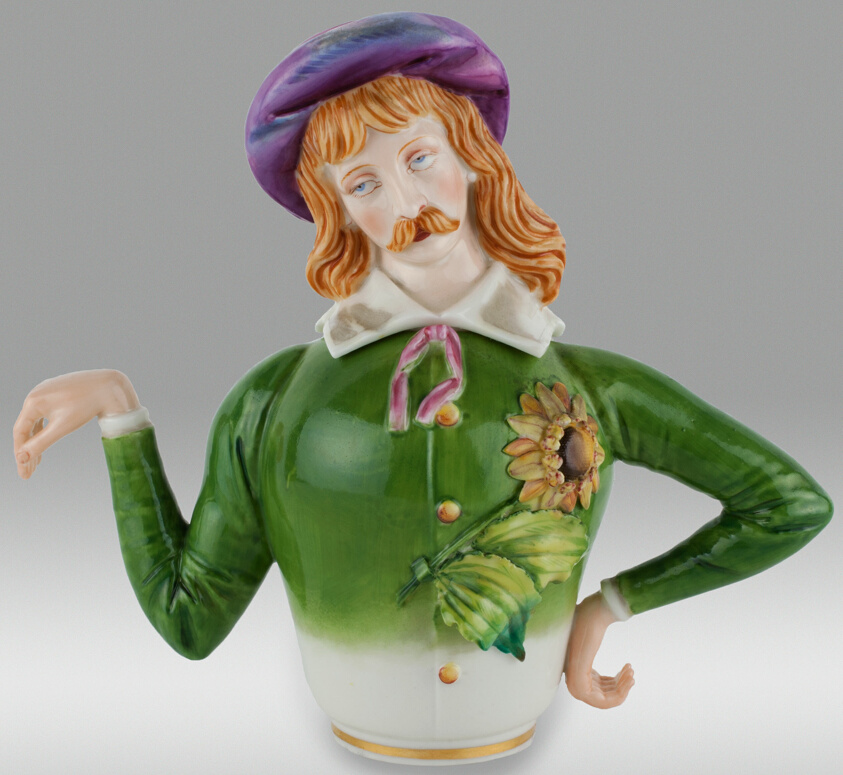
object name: Ceramics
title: Teapot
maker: Designed by James Hadley; English, 1837–1903; Made by the Royal Worcester Porcelain Company; Worcester, England, reorganized 1862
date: 1882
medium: Glazed and enameled Parian ware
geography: England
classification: teapot; ceramics